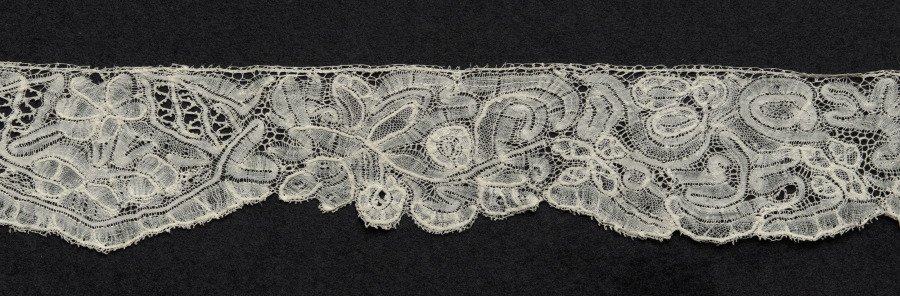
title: Lace Edging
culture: Belgium, Brussels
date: 1700s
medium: Bobbin lace (Point d'Angleterre)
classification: Lace